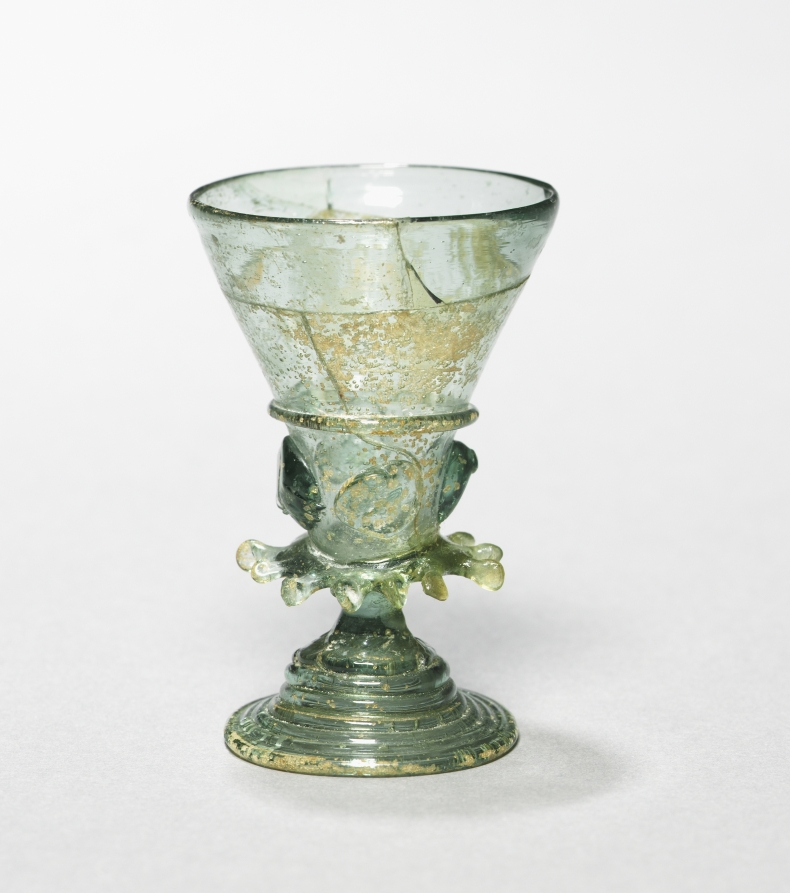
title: Goblet (Berkemeyer)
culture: Germany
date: c. 1525–1550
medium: green glass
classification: Glass